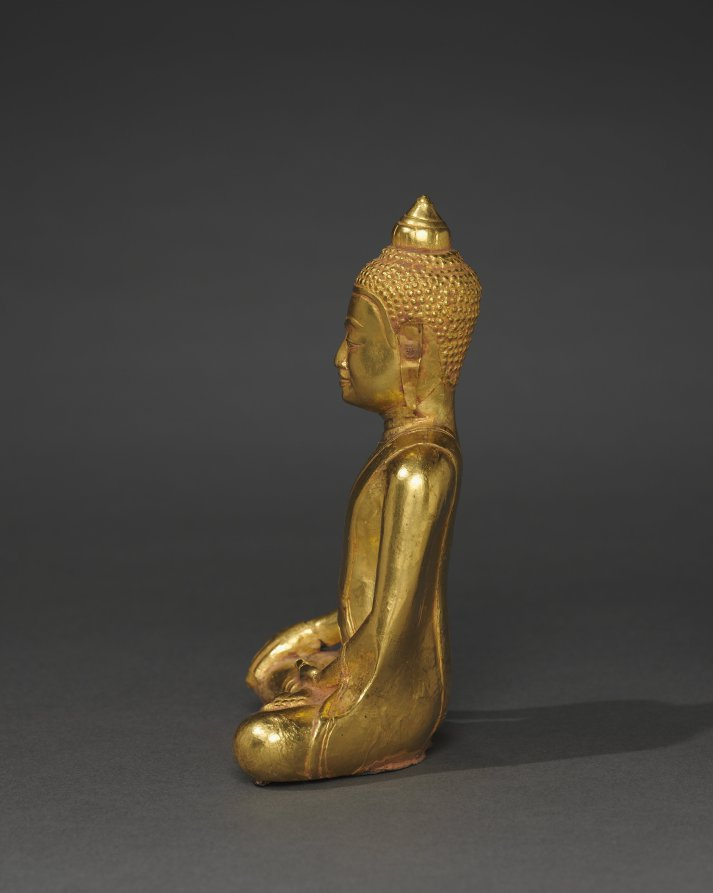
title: Seated Buddha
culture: Thailand, Ayutthaya, Wat Ratchaburana, 14th century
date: before 1424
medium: gold with resin core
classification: Sculpture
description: This pristinely modeled Buddha was fashioned from a sheet of 24-karat gold, using the repoussé (hammering) technique. The figure is filled inside with a resin core. The style is typical of the last phase of Khmer art (800s–1400s), the Lapburi style, which combines characteristics of both Cambodian and Thai sculptural styles.